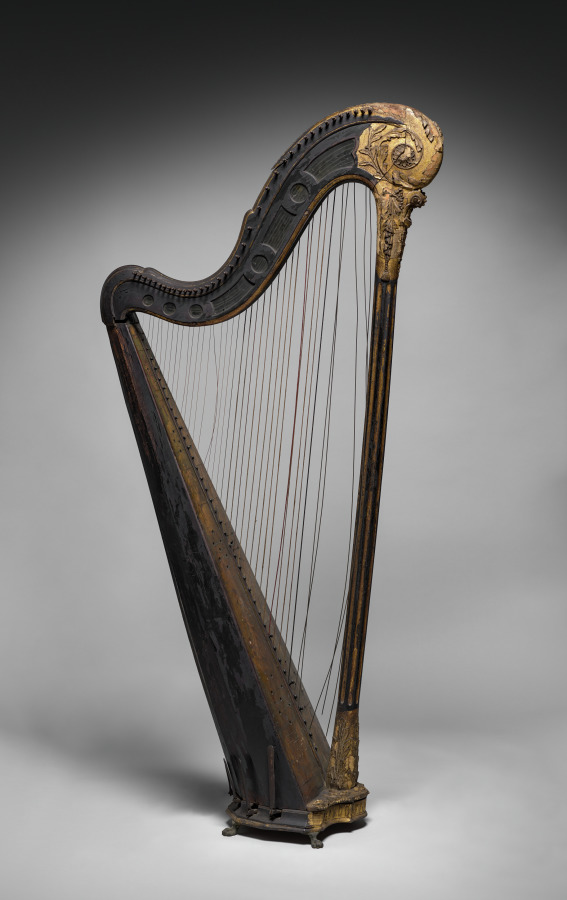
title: Harp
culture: France, 18th century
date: 1700s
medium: wood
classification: Musical Instrument